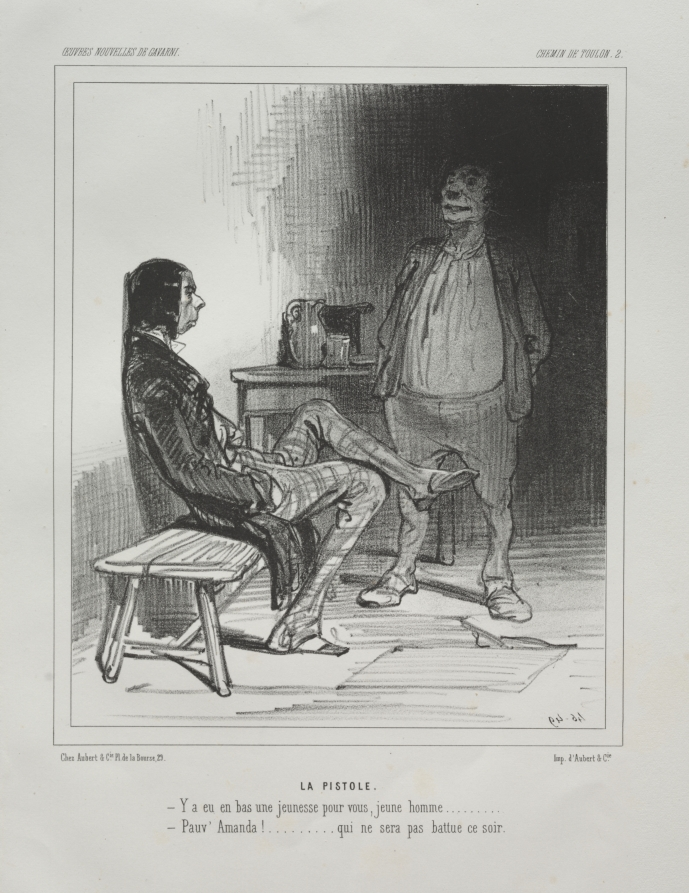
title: Chemin de Toulon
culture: France, 19th century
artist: Paul Gavarni (French, 1804–1866)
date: c. 1846–47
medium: lithograph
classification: Print